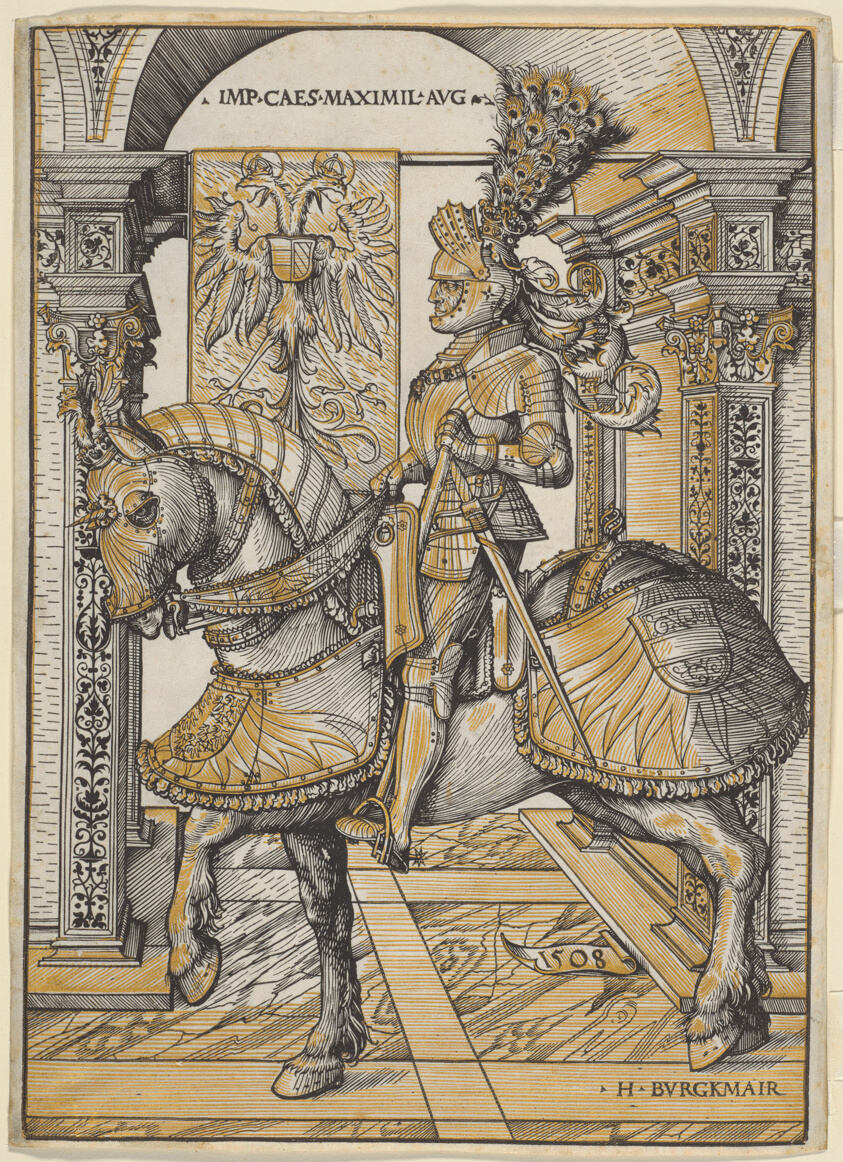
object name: Print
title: Equestrian Portrait of the Emperor Maximilian I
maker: Hans Burgkmair the Elder; German, 1473-1531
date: 1508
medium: Woodcut from two blocks in black and gold on vellum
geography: Germany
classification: woodcut; print; prints and drawing